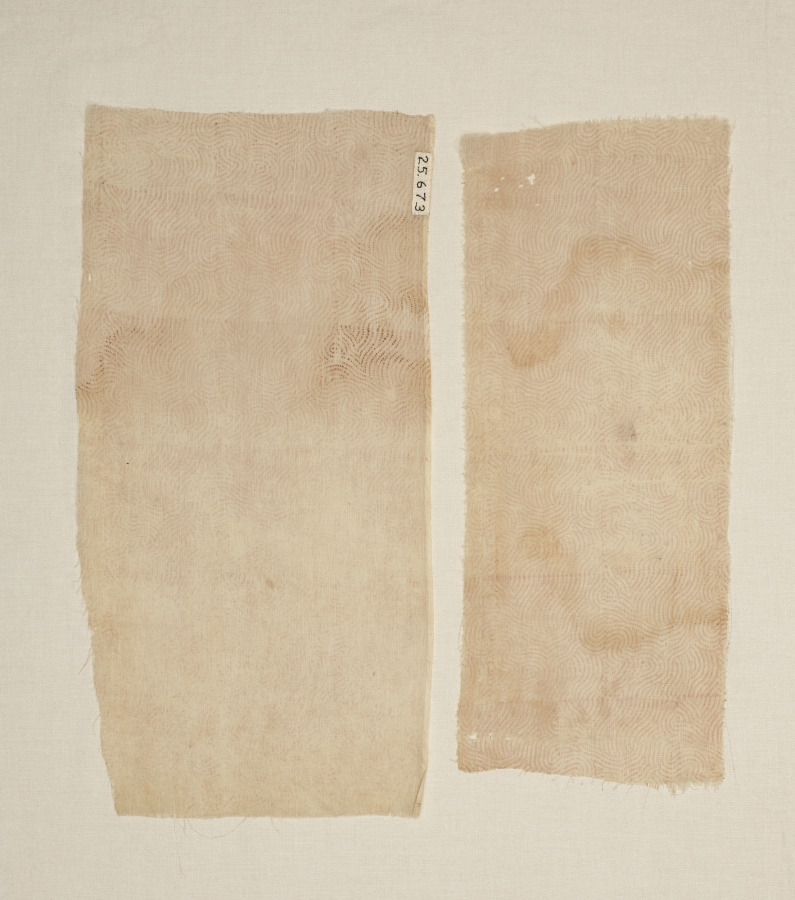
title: Fragment of Draped Apparel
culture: India, Rajasthan or Northern Deccan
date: 1700s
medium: Block printed with gold leaf (varak) on undyed plain weave cotton muslin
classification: Textile